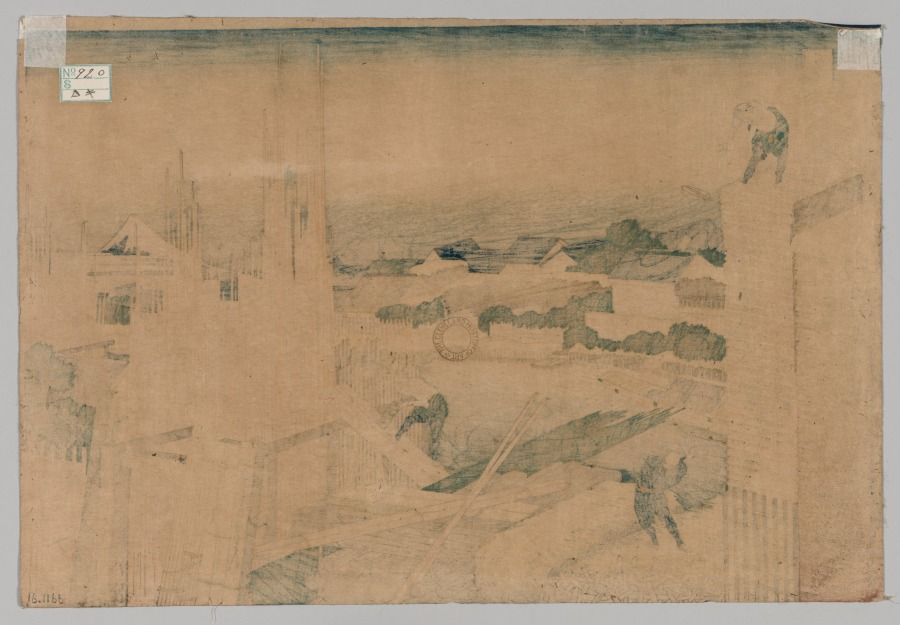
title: Lumber Yard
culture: Japan, Edo period (1615–1868)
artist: Katsushika Hokusai (Japanese, 1760–1849)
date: 1760–1849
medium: color woodblock print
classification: Print